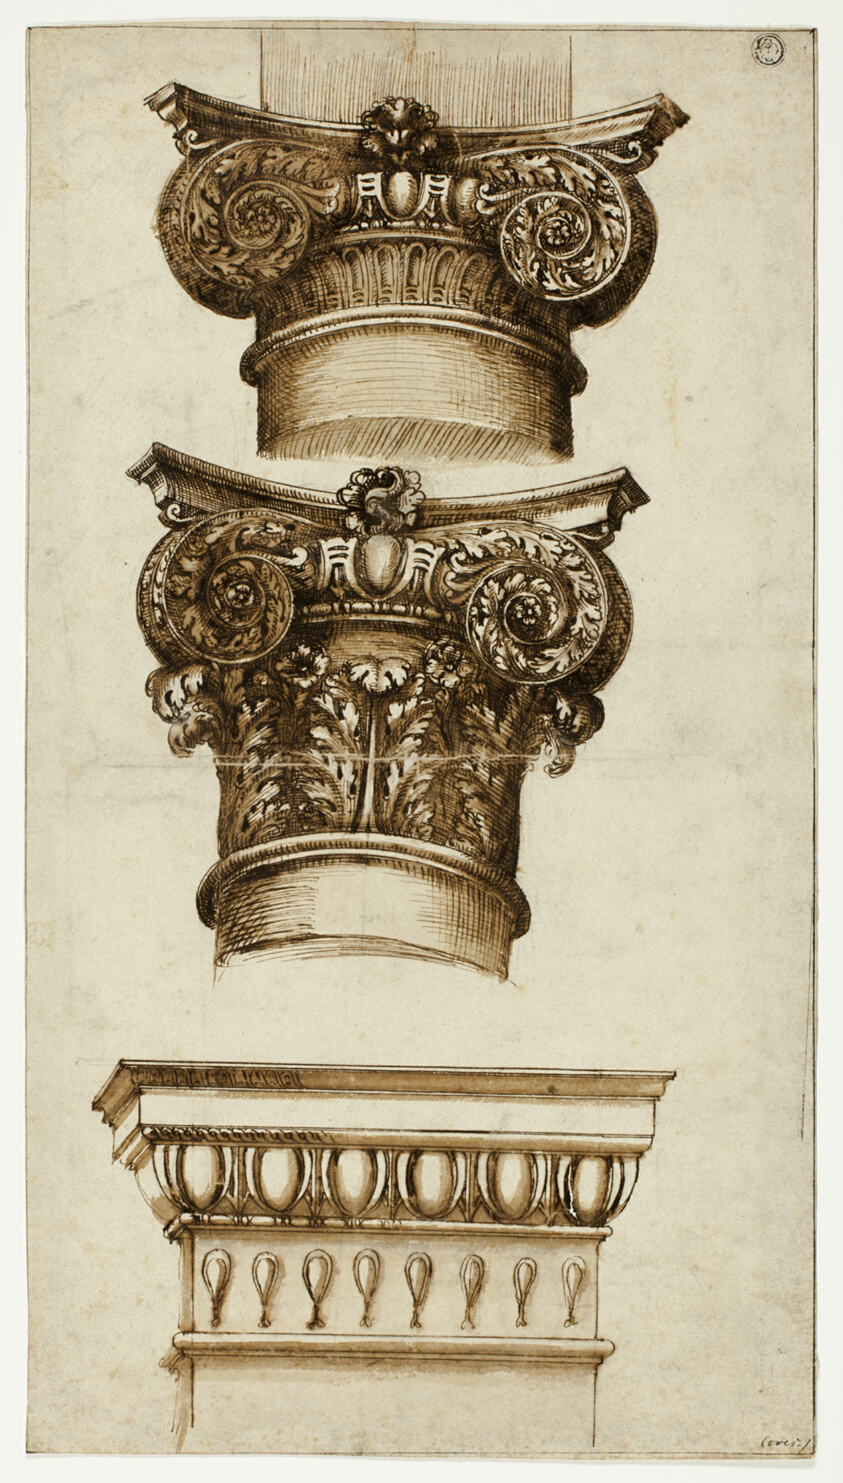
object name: Drawing and Watercolor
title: Three Column Capitals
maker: Giovanni Battista Piranesi (Italian, 1720-1778); style of Cherubino Alberti (Italian, 1553-1615)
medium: Pen and brown ink with brush and brown wash, over traces of black chalk, on ivory laid paper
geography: Italy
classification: pen and ink drawings; drawings (visual works); prints and drawing